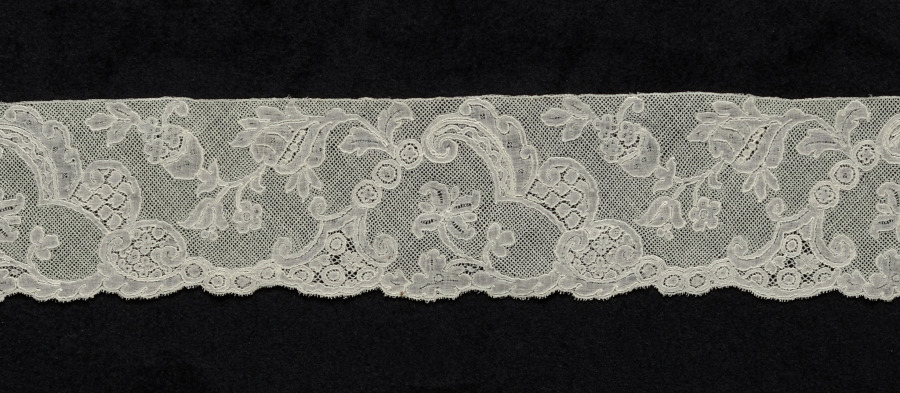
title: Lace Edging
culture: Belgium, Mechelen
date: 1700s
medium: Bobbin lace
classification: Lace